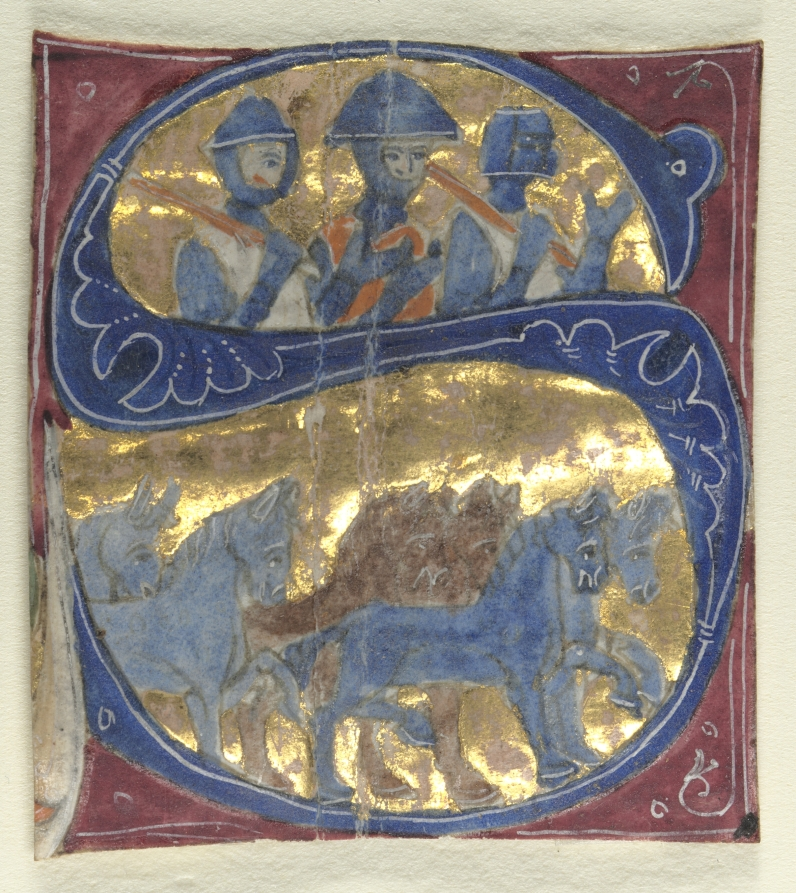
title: Historiated Initial (S) Excised from a Bible: Soldiers and Horses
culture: Italy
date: 1200s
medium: tempera and gold on parchment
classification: Manuscript